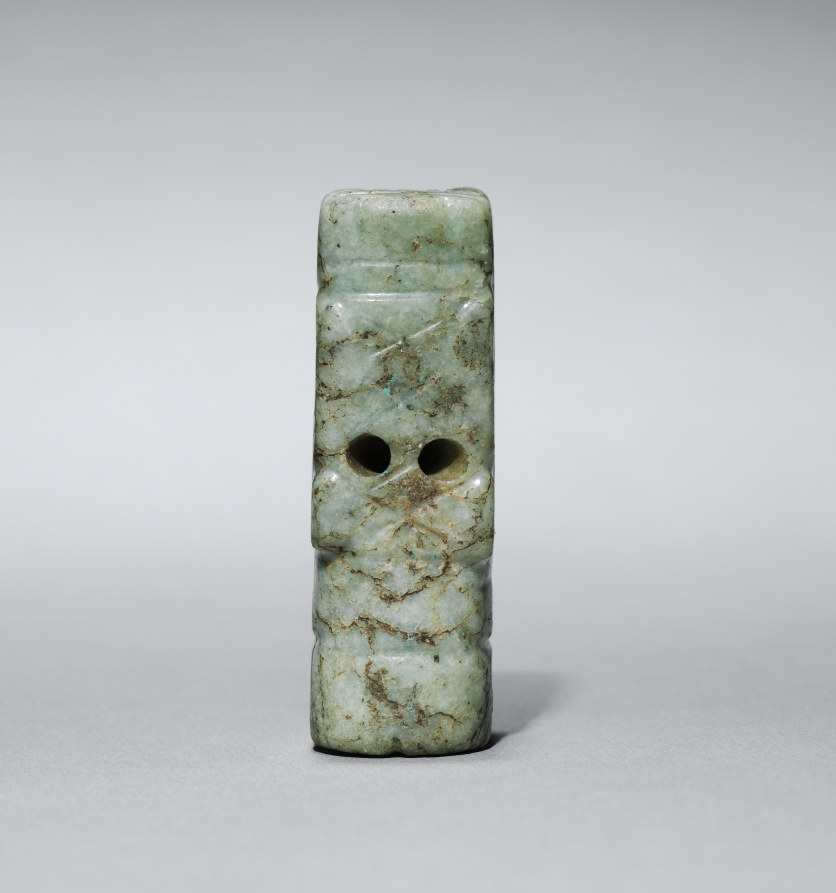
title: Figurine Pendant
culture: Mexico, Oaxaca, Mixtec style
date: c. 1200–1519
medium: jade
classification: Jade